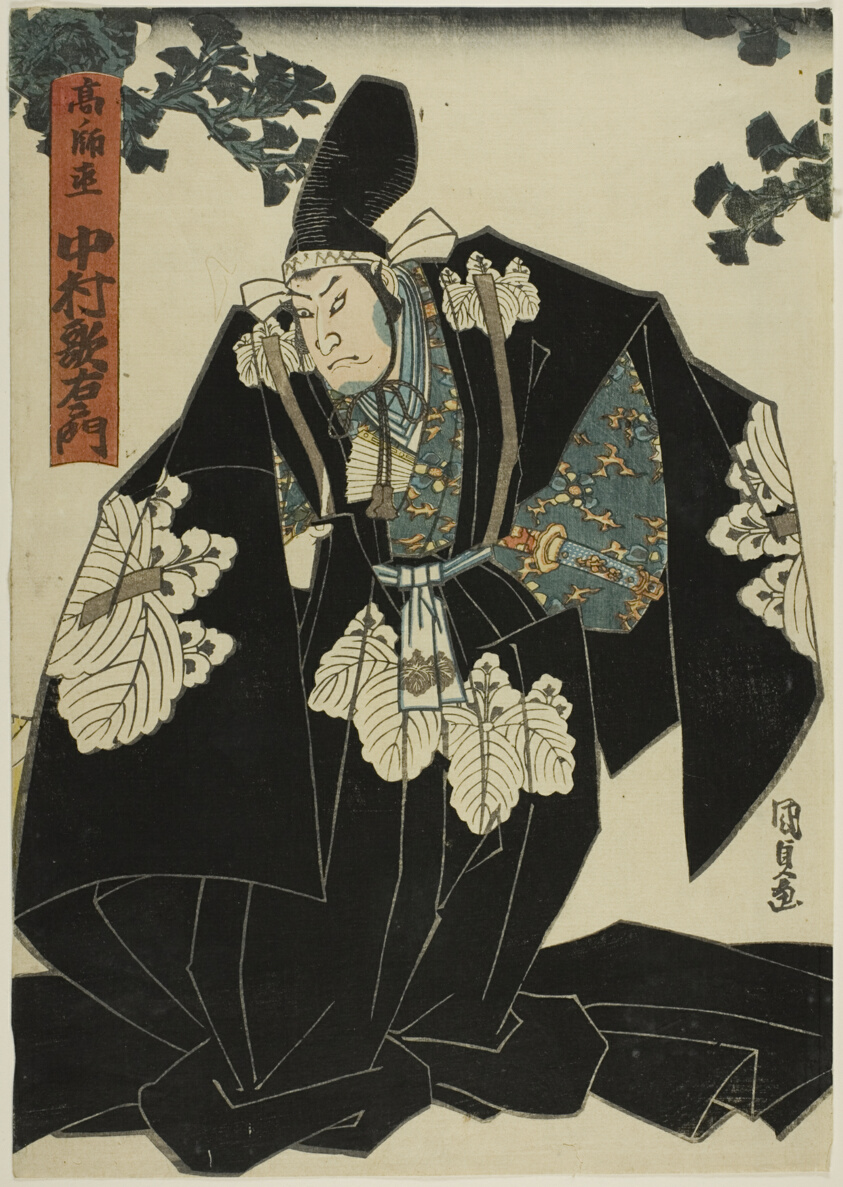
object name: Print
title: Ko no Morono (Taka no Mronao) in the Play Chushingura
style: Japanese (culture or style)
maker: Utagawa Kunisada I (Toyokuni III) (Japanese, 1786-1864)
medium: Color woodblock print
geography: Japan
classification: woodblock print; print